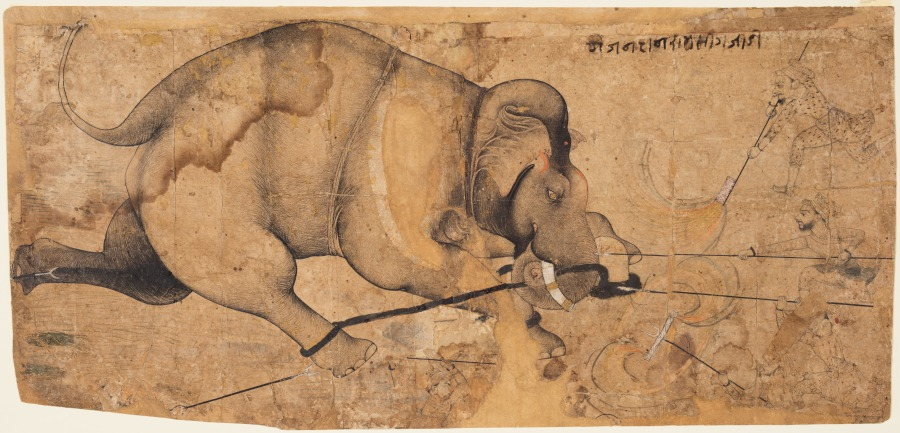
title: Rao Ram Singh I’s Elephant Gone Amok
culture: Northwestern India, Rajasthan, Rajput Kingdom of Kota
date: c. 1700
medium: gum tempera, ink, and gold on paper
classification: Drawing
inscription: gaja nahāna rāma sīga jī kī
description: A royal elephant, named Nahan, according to the inscription, is attempting to free itself by breaking the chain. His ears are flexed forward, and his great mass overwhelms the five men trying to control the elephant with spears and firecrackers tied to sticks. The artist used gold in the elephant’s eye to emphasize the intensity of expression.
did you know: The tusks are ornamented with gold rings, and the sharp tips have been trimmed.